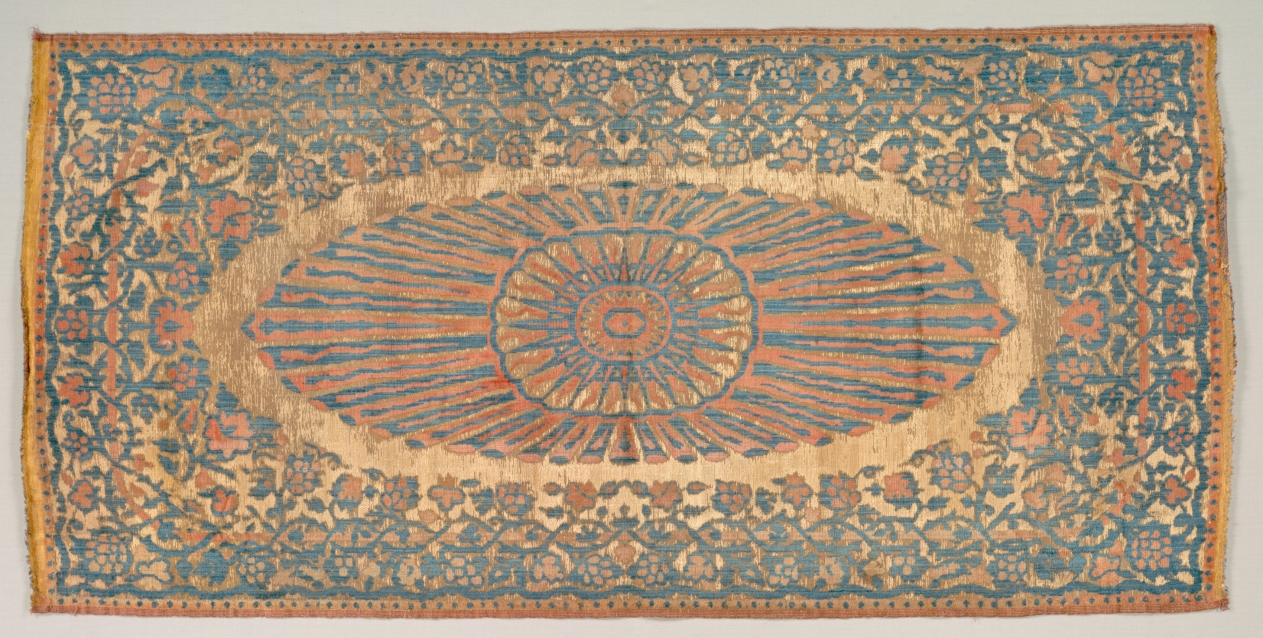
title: Cushion cover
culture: Turkey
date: 1800–1850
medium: velvet, brocaded: silk and metal thread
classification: Velvet